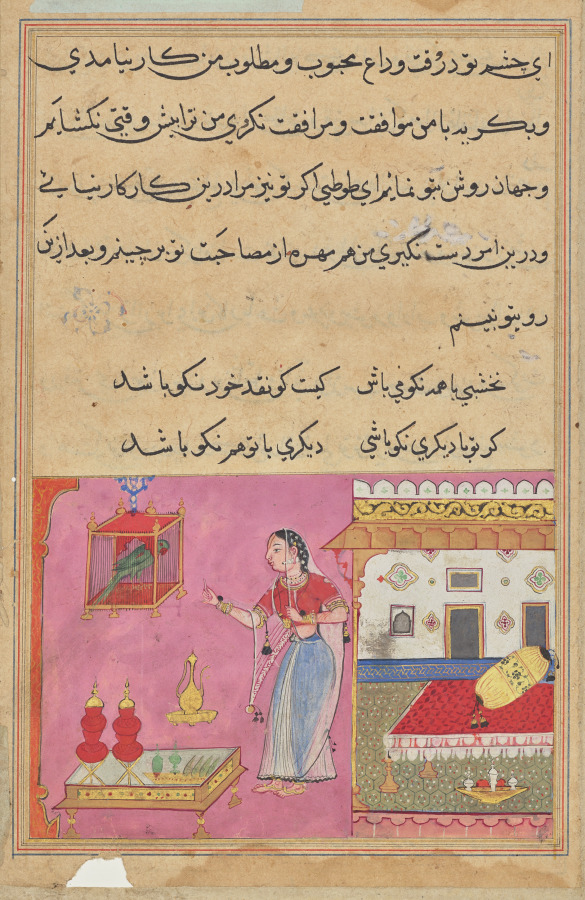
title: The Parrot Addresses Khujasta at the Beginning of the Twentieth Night, from a Tuti-nama (Tales of a Parrot)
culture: Mughal India, court of Akbar (reigned 1556–1605)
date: c. 1560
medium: gum tempera, ink, and gold on paper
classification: Painting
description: Tuti the parrot begins telling Khujasta a story about the daughter of a pious man who turned down three suitors, so she could follow religious pursuits. She stands outside her bed chamber, where a low table has stacked red water jugs, and a dish with ingredients to make paan. The golden ewer and basin are for handwashing.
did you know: Khujasta is wearing an ivory-peg earring.